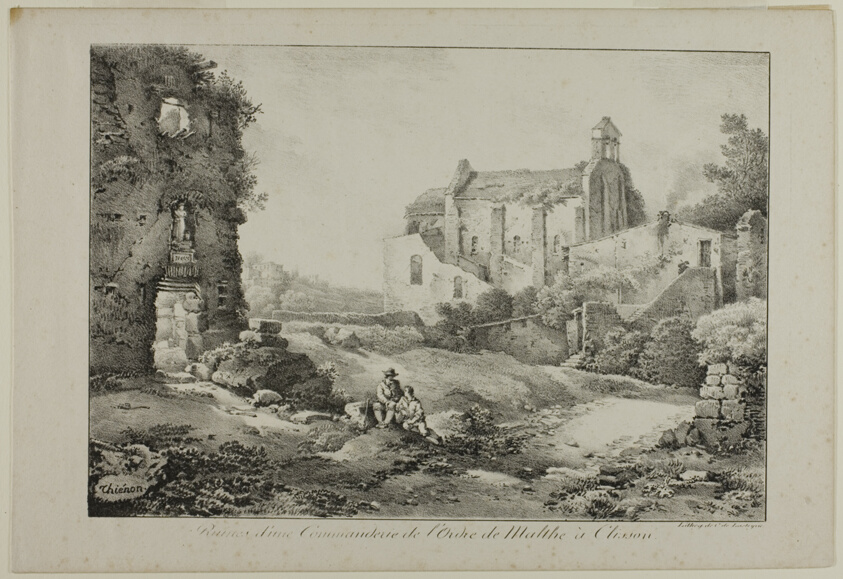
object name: Print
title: Ruins of the Commanding Post of the Order of Malta, Clisson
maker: Claude Thienon (French, 1772-1846); printed by Comte de Charles Philibert Lasteyrie du Saillant (French, 1759-1849)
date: 1817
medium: Lithograph in black on ivory wove paper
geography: France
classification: lithograph; print; prints and drawing